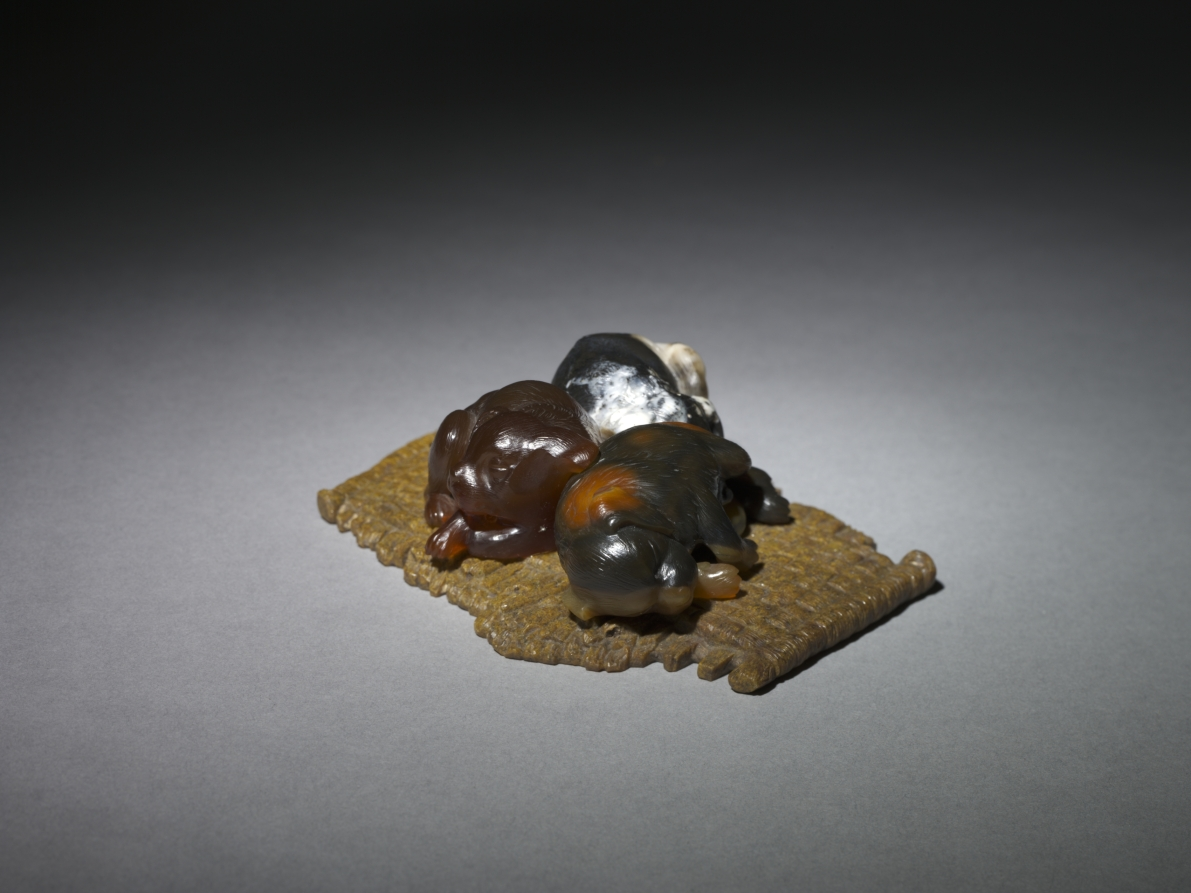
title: Sleeping Puppies on a Mat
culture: Russia, St. Petersburg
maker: House of Fabergé (Russian, 1842–1918)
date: c. 1895–1915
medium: agate, chalcedony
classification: Miscellaneous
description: In creating luxurious accessories for a desk or tabletop, Fabergé often used native hardstones such as multicolored agate and jasper, green nephrite, pink rhodonite, and rock crystal found in the Ural Mountains of western Russia. By paying careful attention to the unique colors and textures of the stones, Fabergé and his craftsmen brought them to life, turning milky agate into a begging poodle or brown and black jasper into these sleeping puppies. The use of native materials also promoted Russian nationalism, which appealed greatly to the tsar and his family.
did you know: Fabergé's artisans used multiple types of stone to make each puppy unique. Even the little rug they are sleeping on is made of stone.